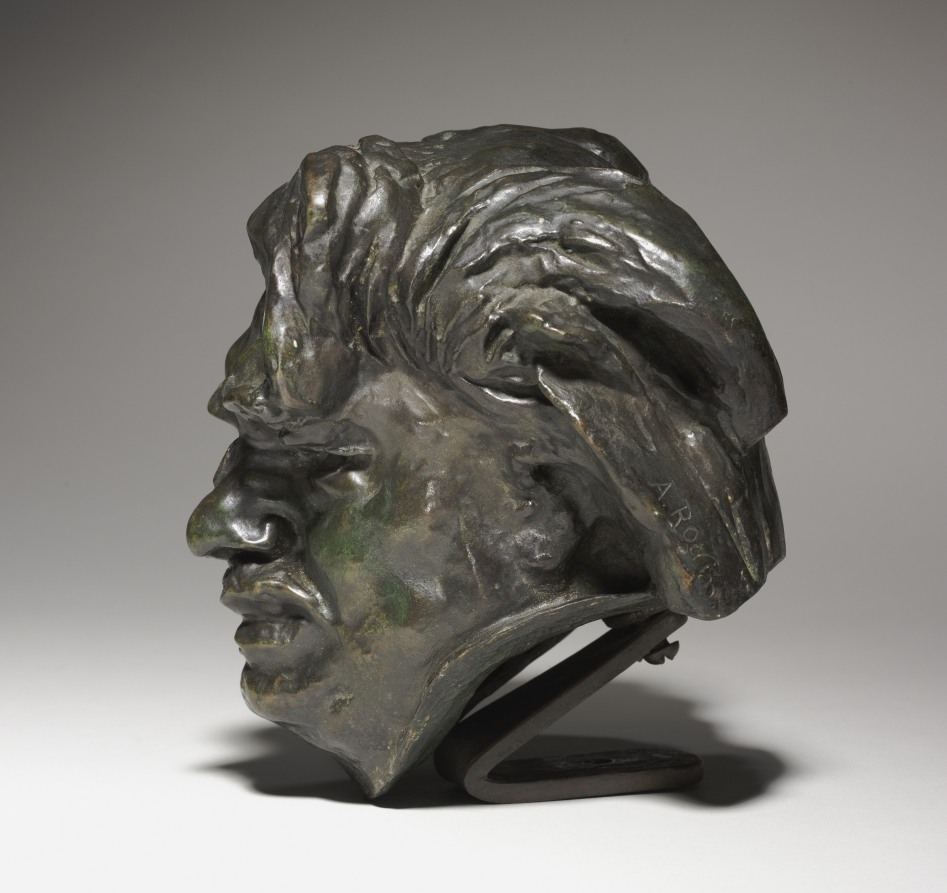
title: Study for the Head of the Monument to Honoré de Balzac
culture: France, late 19th-early 20th Century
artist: Auguste Rodin (French, 1840–1917)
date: 1893–1897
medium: bronze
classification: Sculpture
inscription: Signed on hair to right: "A. Rodin"